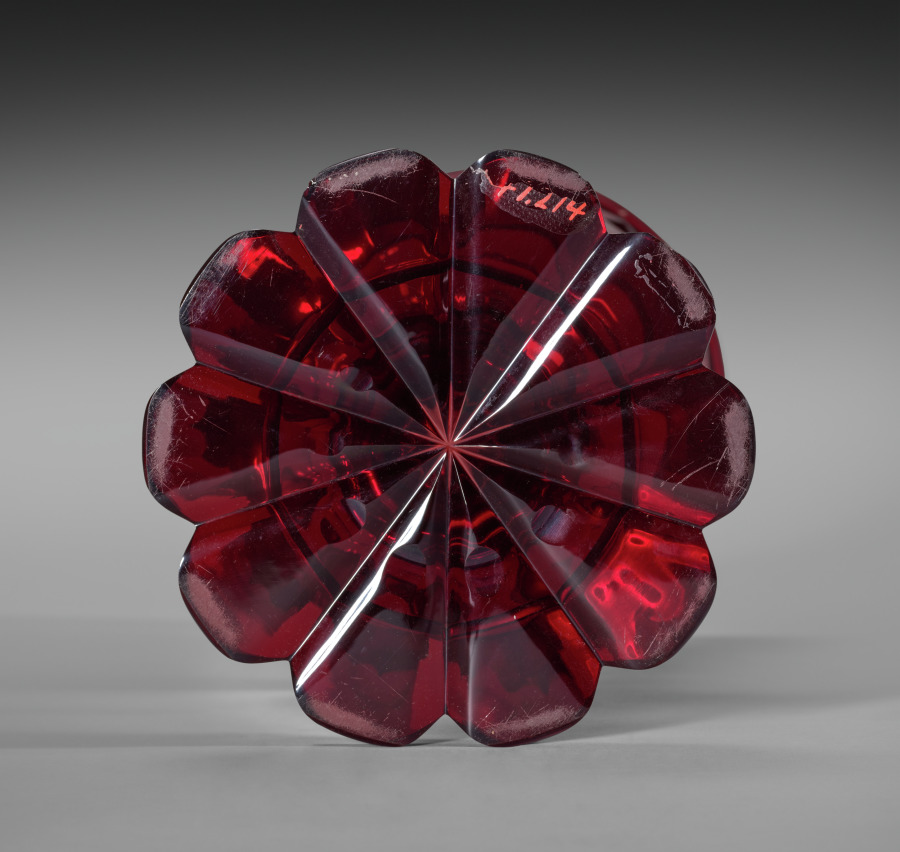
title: Cup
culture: Bohemia, 19th century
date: mid-1800s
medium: ruby glass with engraved decoration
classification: Glass